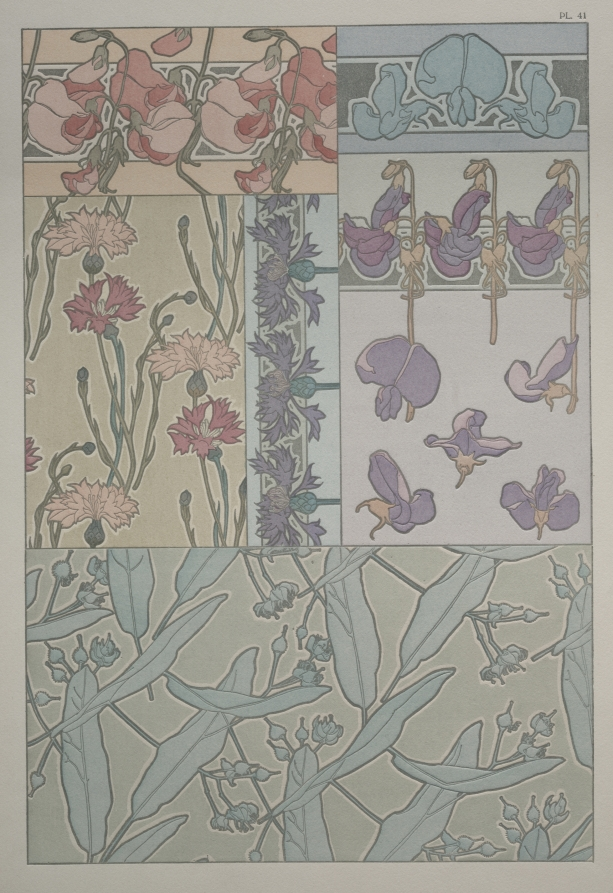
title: Documents Decoratifs: Plate 41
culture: Czechoslovakia, late 19th-early 20th century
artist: Alphonse Mucha (Czech, 1860–1939)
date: 1901–2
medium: lithograph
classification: Print